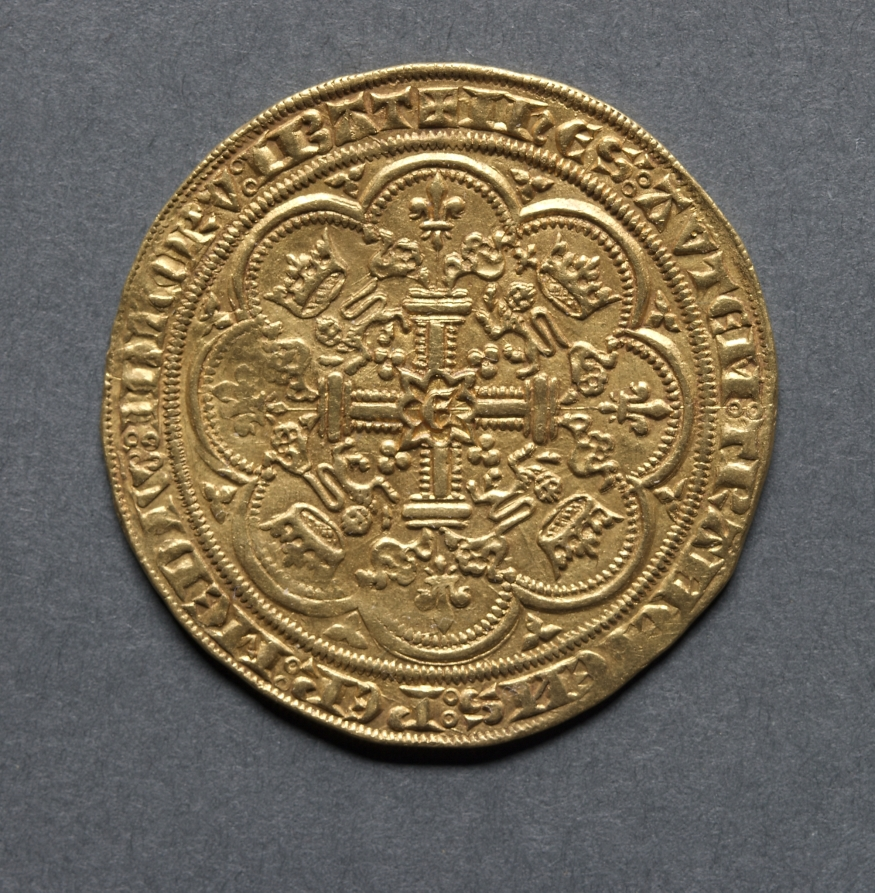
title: Noble: Ornamental Cross with Lis Terminals (reverse)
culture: England, Edward III, 1327-1377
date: 1351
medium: gold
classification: Coins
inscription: IHES AVTEM TRANSIENS PER MEDIV. ILLORV IBAT